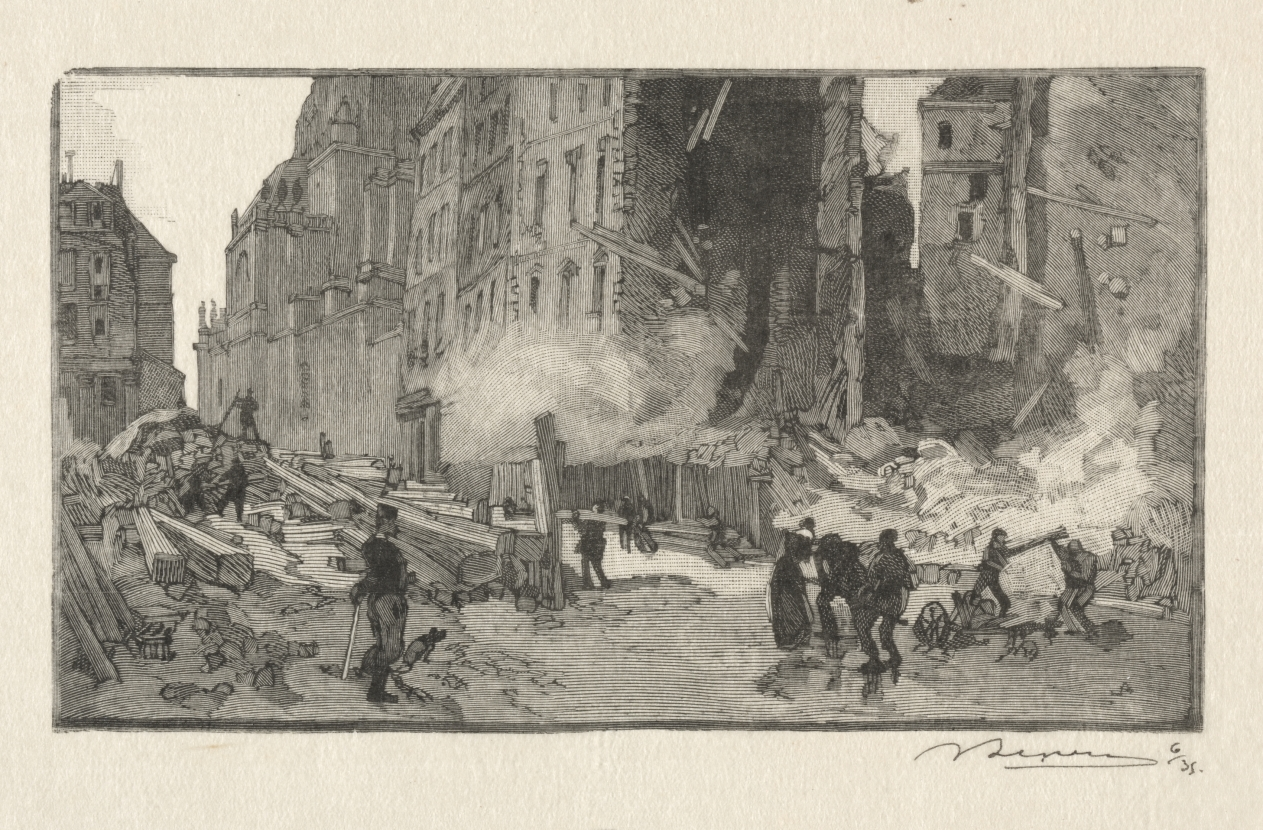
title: Place Gerson and Rue Restot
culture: France, 19th-20th century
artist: Auguste Louis Lepère (French, 1849–1918)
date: c. 1870–1918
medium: wood engraving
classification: Print